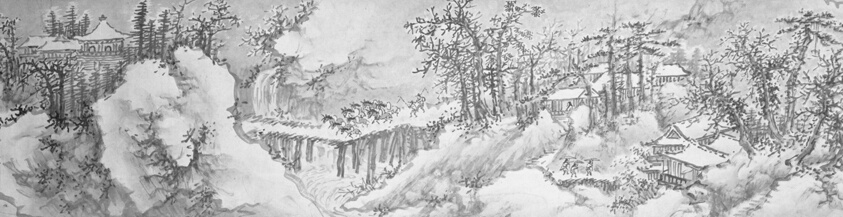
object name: Painting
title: Winter Landscape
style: Chinese (culture or style)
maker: Xie Shichen (Chinese, 1487-after 1567)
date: Ming dynasty (1368–1644)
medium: Handscroll; ink with touches of color on paper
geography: China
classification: handscroll; painting; asian art